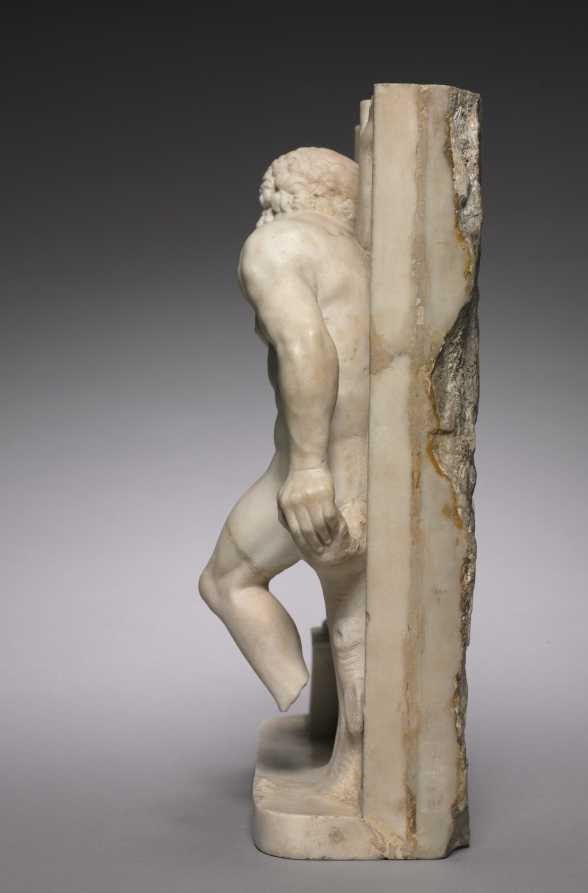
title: Philoctetes on the Island of Lemnos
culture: Italy, 16th century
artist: workshop of Giovanni Maria Mosca (Italian, 1495/99–1574)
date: c. 1510–1515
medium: marble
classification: Sculpture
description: A snake bit the Greek warrior Philoctetes en route to the Trojan War. The stench of the infected wound led the ship’s crew to abandon him on the island of Lemnos, where he fans the agonizing injury with a bird’s wing. The warrior’s noble suffering in the face of tremendous pain would have been a classical model of stoic composure, highly valued in Renaissance court culture.